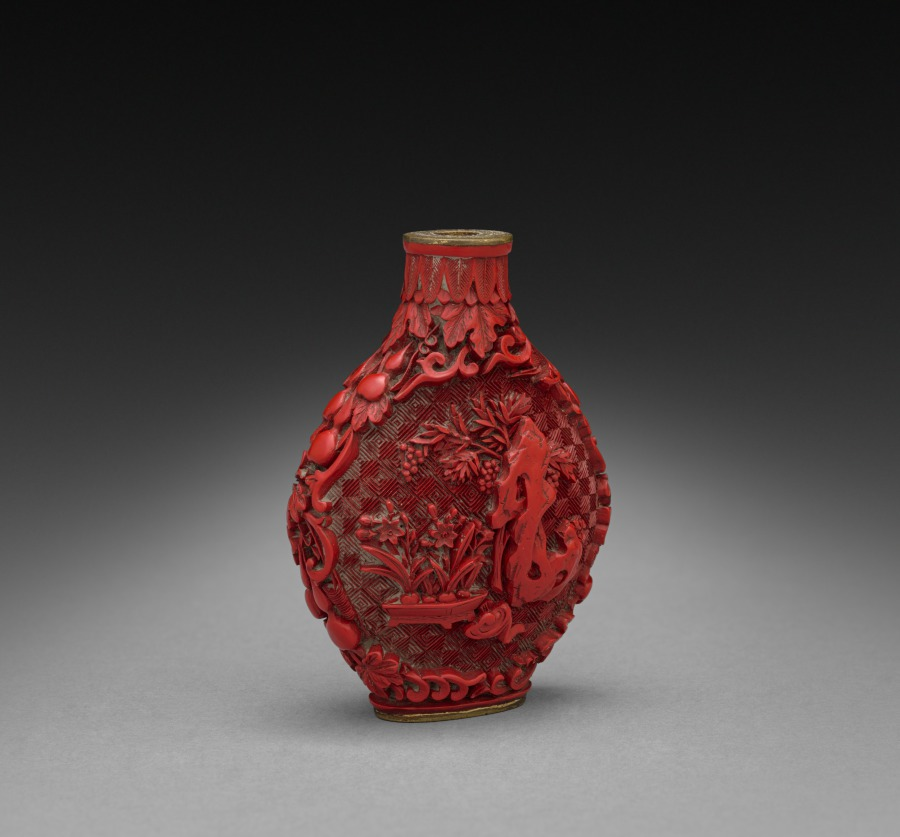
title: Snuff Bottle with Flowers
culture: China, Qing dynasty (1644-1911), Qianlong mark and reign (1736-95)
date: 1736–95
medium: carved cinnabar lacquer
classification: Lacquer